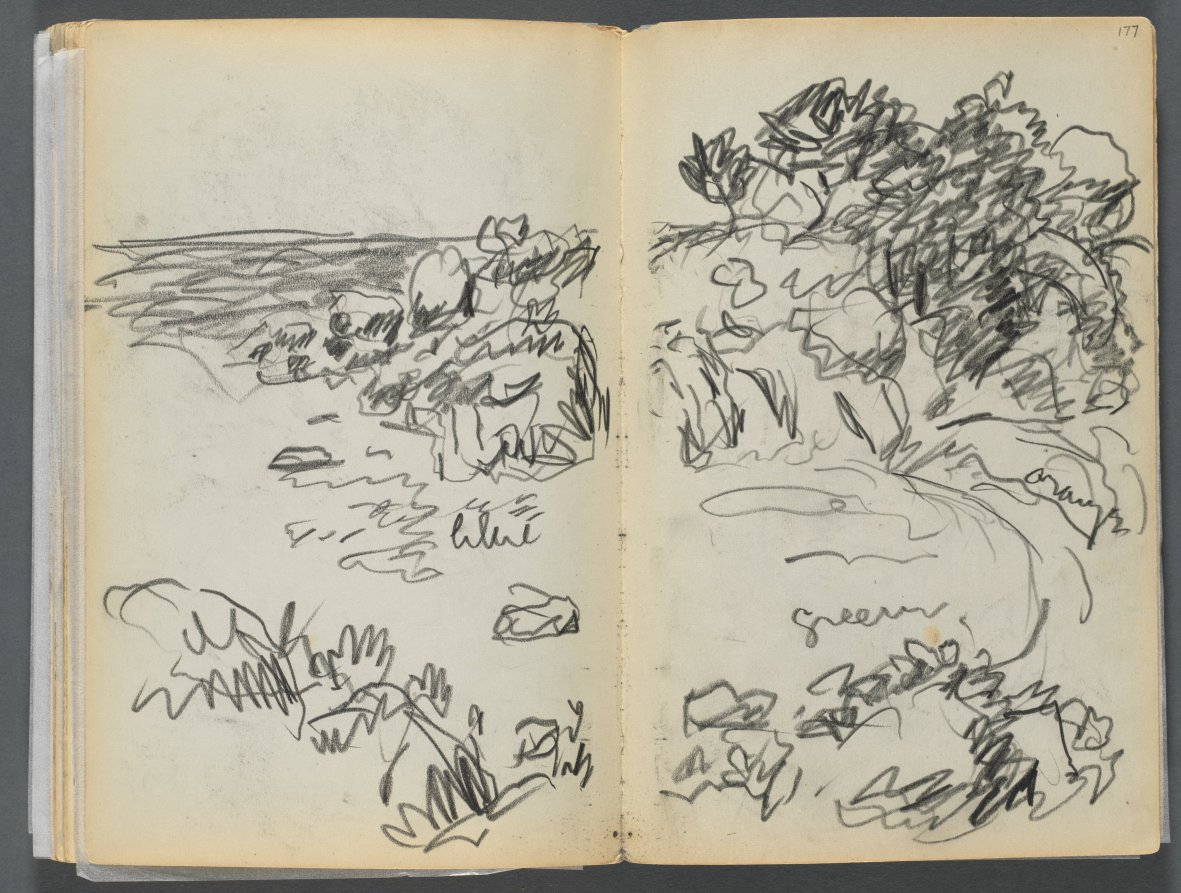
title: Sketchbook- The Granite Shore Hotel, Rockport, page 176 & 177: Landscape with Color Notations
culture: America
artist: Maurice Prendergast (American, born Newfoundland [now Canada], 1858–1924)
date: 1905–10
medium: graphite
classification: Bound Volume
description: This sketchbook contains 72 pages of pencil drawings and 9 watercolors of Cape Ann. On the inside of the cover Prendergast wrote the address of the Granite Shore Hotel in Rockport, Massachusetts.